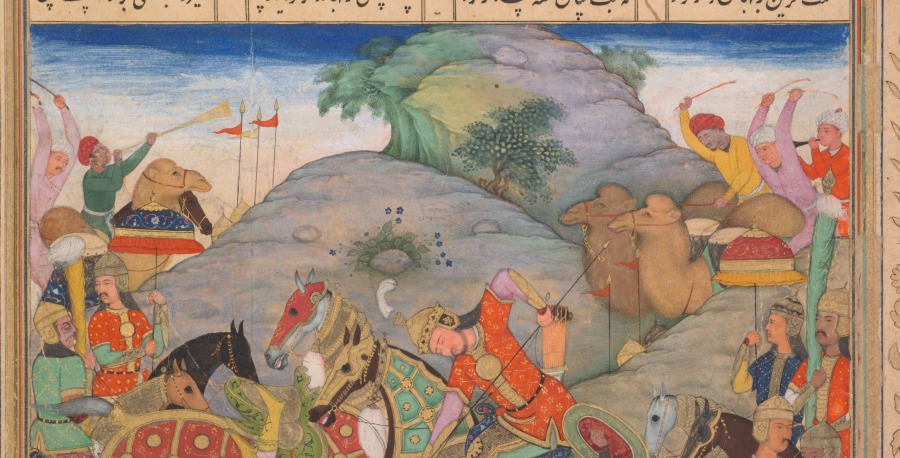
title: Battle between Manuchihr and Tur, from a Shah-nama (Book of Kings) of Firdausi (Persian, c. 934–1020)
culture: Mughal India, court of Jahangir (reigned 1605–27)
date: c. 1610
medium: Gum tempera, ink, and gold on paper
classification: Painting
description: This battle sets the stage for the ages-long enmity in the epic Shah-nama between the people of Iran and Turan—identified as Turkistan, the lands to the east of Iran. The conflict resulted from a bitter family feud that began when a warrior king divided his realm among his three sons; the older two were murderously jealous of the youngest, Iraj, to whom the best lands, those of Iran, were given. In this painting, the warrior in the center is Manuchihr, the grandson of Iraj, avenging his grandfather’s murder by slaying Tur, Iraj’s older brother to whom the less desirable lands of Turan were given. The confusion of battle is skillfully rendered through clustering warriors and warhorses together with varied postures, colors, and patterns.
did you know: Battles were waged to the sound of horns and the beat of drums on camels.